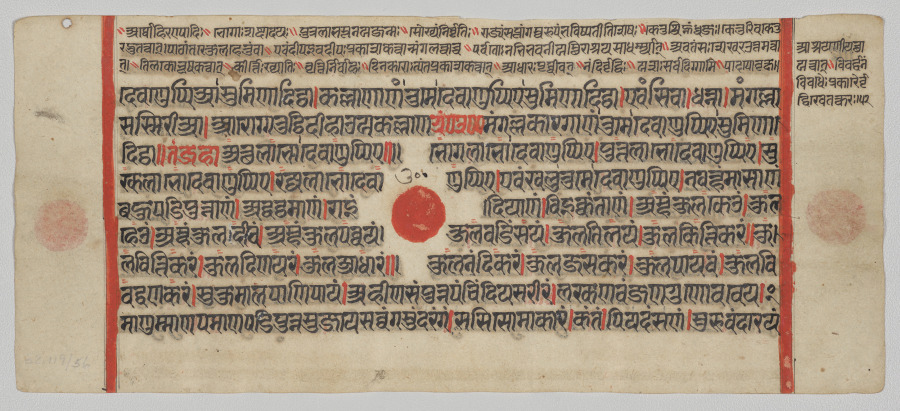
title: Text, Folio 20 (recto), from a Kalpa-sutra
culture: Western India, Gujarat, last quarter of the 15th century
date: c. 1475–1505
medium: Gum tempera, ink, and gold on paper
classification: Painting